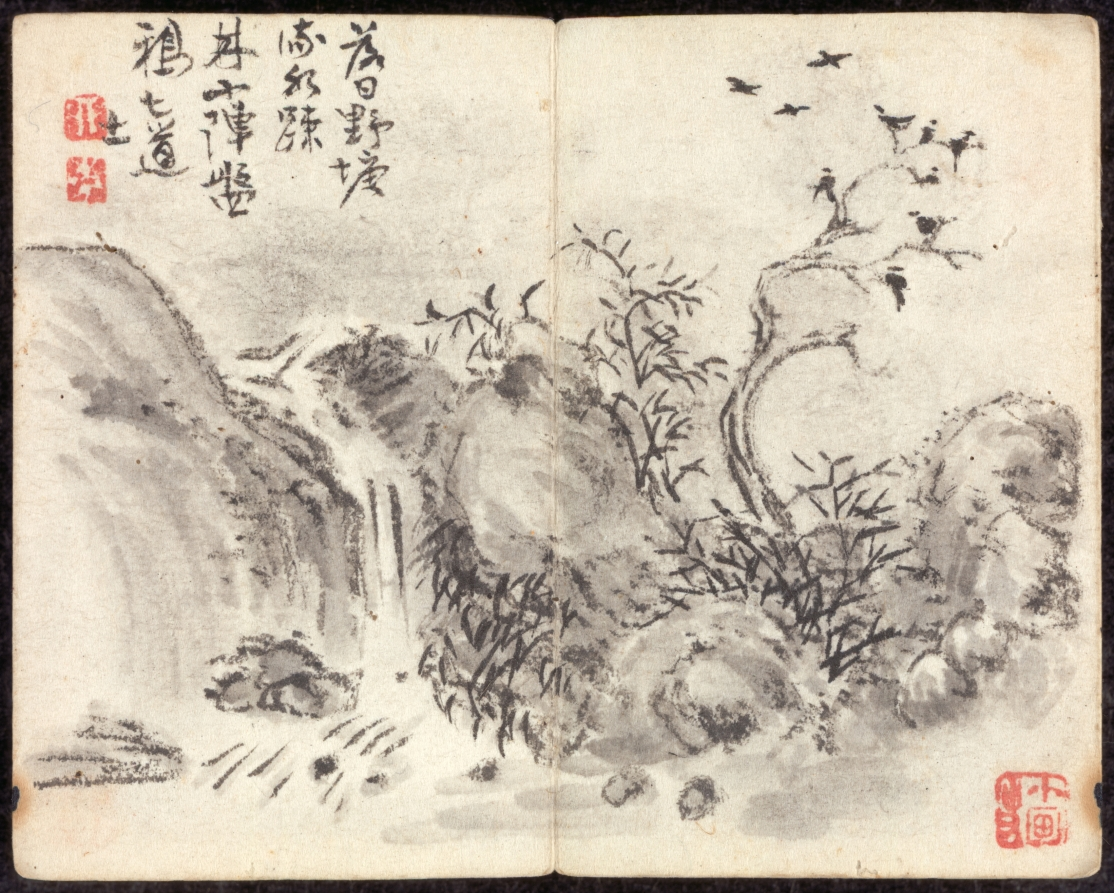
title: Miniature Album with Figures and Landscape (Waterfall Landscape)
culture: China, Qing dynasty (1644–1911), Qianlong reign (1736–95)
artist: Zeng Yandong (Chinese, c. 1751–1827)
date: 1822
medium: album leaf, ink and color on paper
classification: Painting